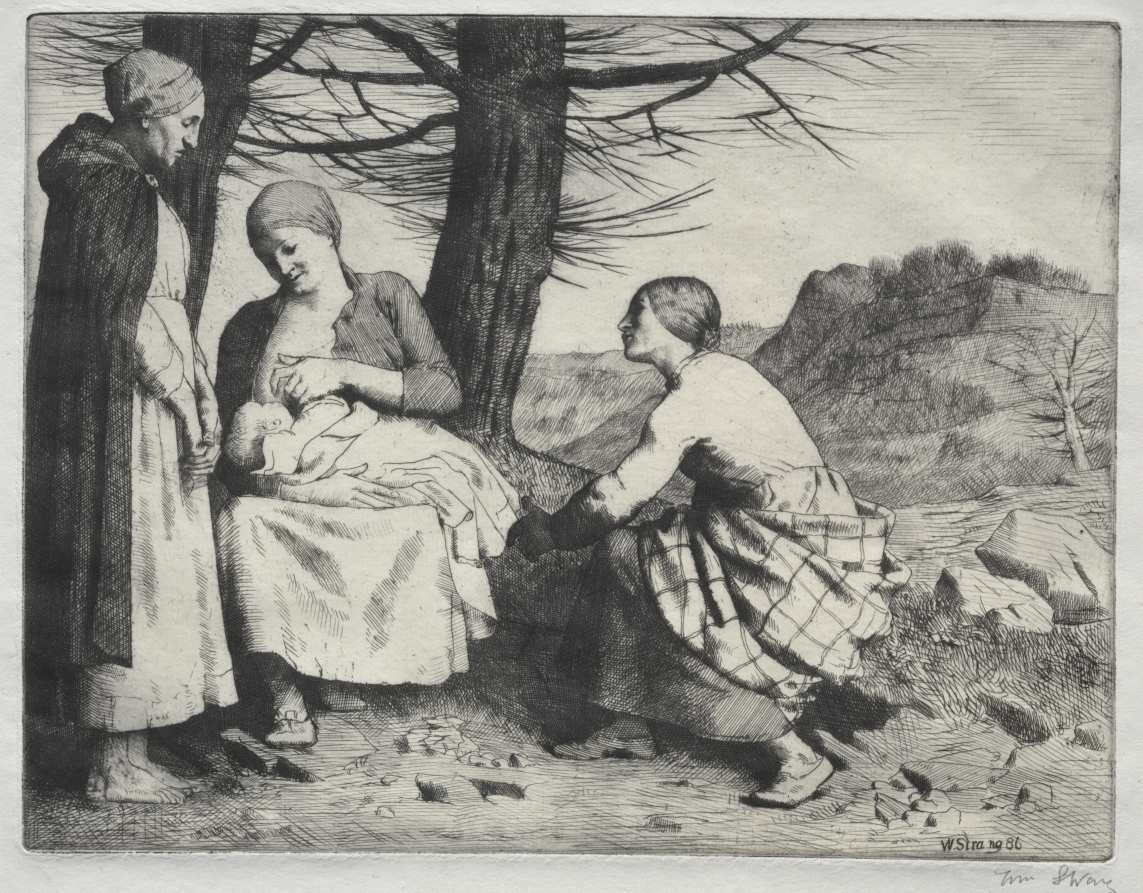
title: Woman and Child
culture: England, 19th century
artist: William Strang (British, 1859–1921)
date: c. 1886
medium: etching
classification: Print